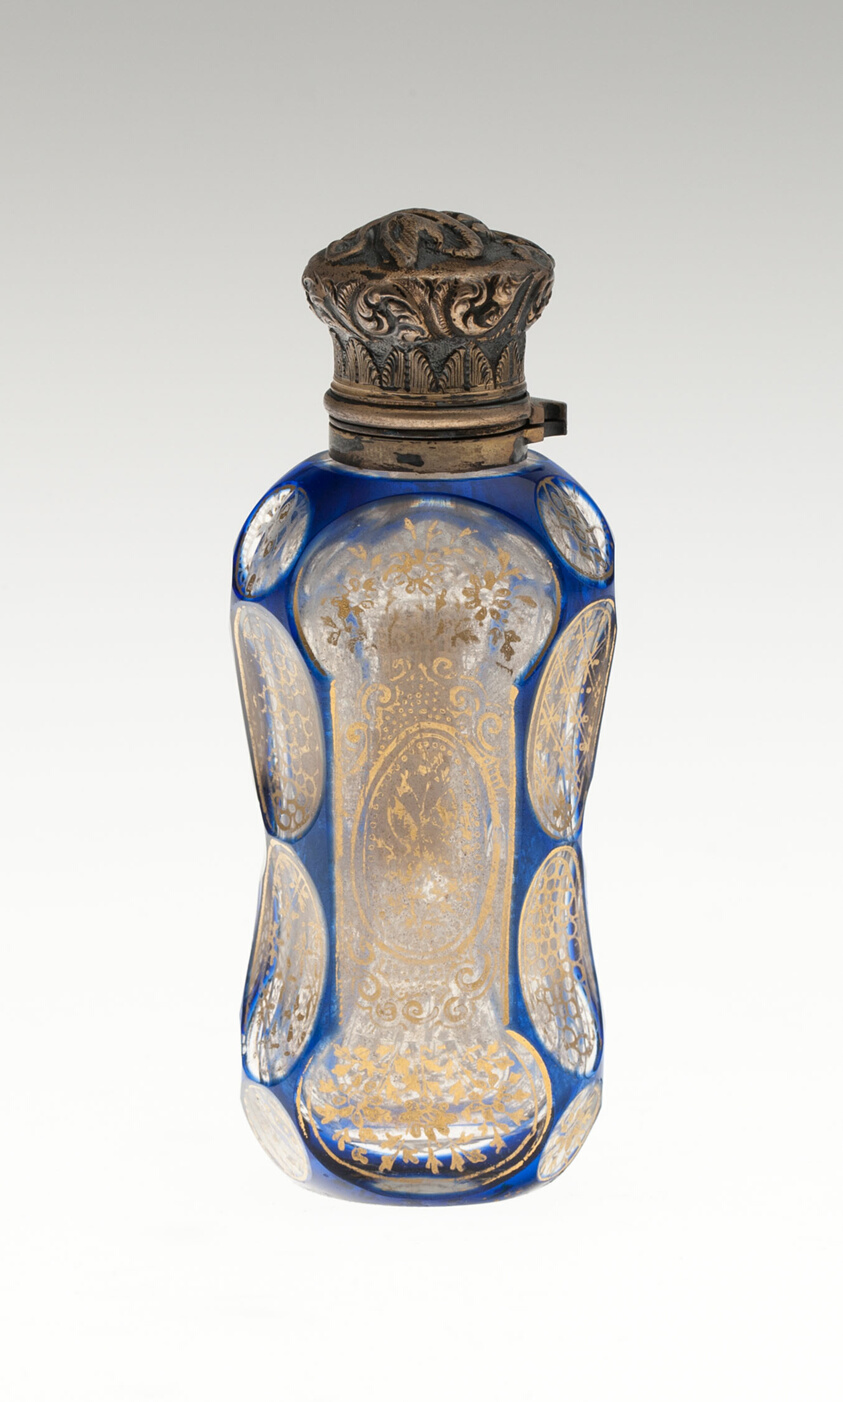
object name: Glass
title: Scent Bottle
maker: Bohemia, Czech Republic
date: c. 1840/50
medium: Glass; cut and colored with metal mounts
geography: Bohemia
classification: glass; european decorative arts